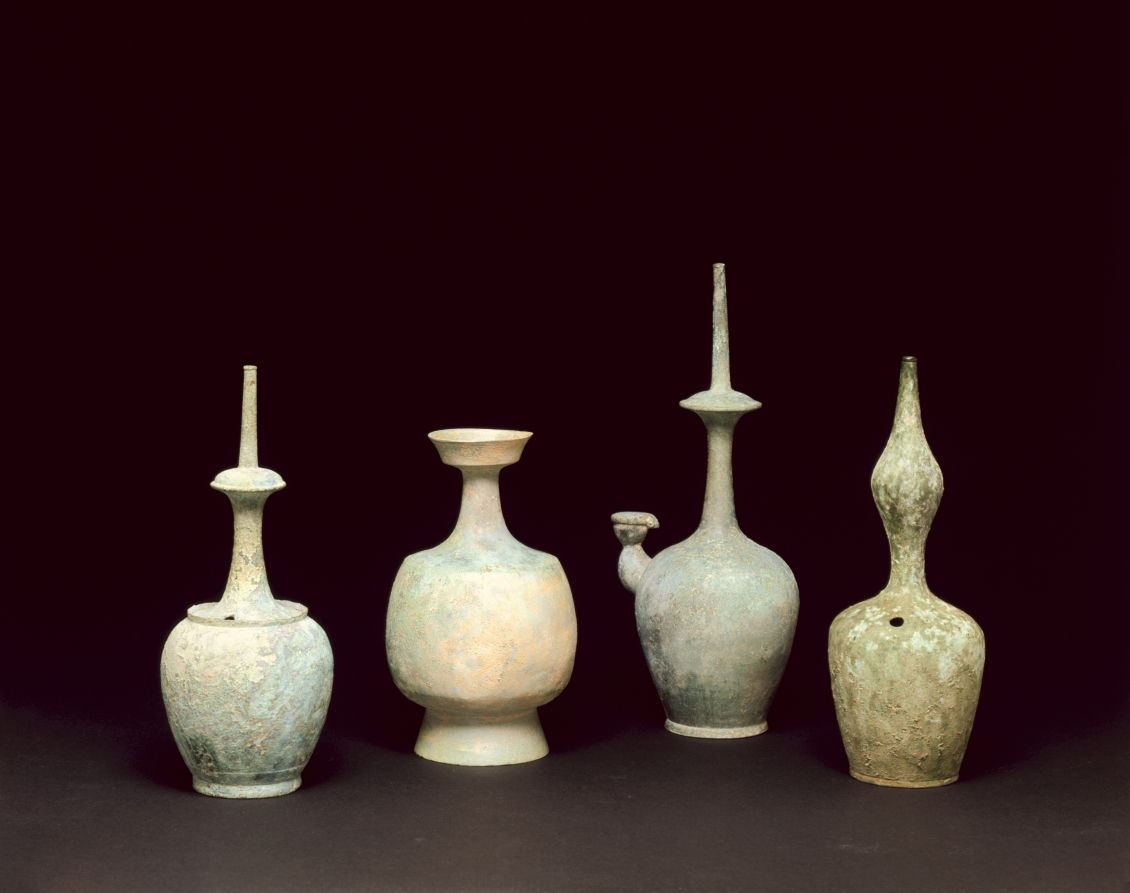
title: Gourd-Shaped Bottle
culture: Korea, Goryeo dynasty (918–1392)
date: 918–1392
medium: bronze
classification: Metalwork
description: As early as the seventh century, the practice of drinking tea and wine became an important part of elite culture in Korea. Elites of the Goryeo period commissioned a variety of types of ceramic and metal utensils including this bronze bottle, not only to make their drinking experience more exciting, but also to show their appreciation of nature.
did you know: This gourd-shaped bottle may have been used to serve wine.